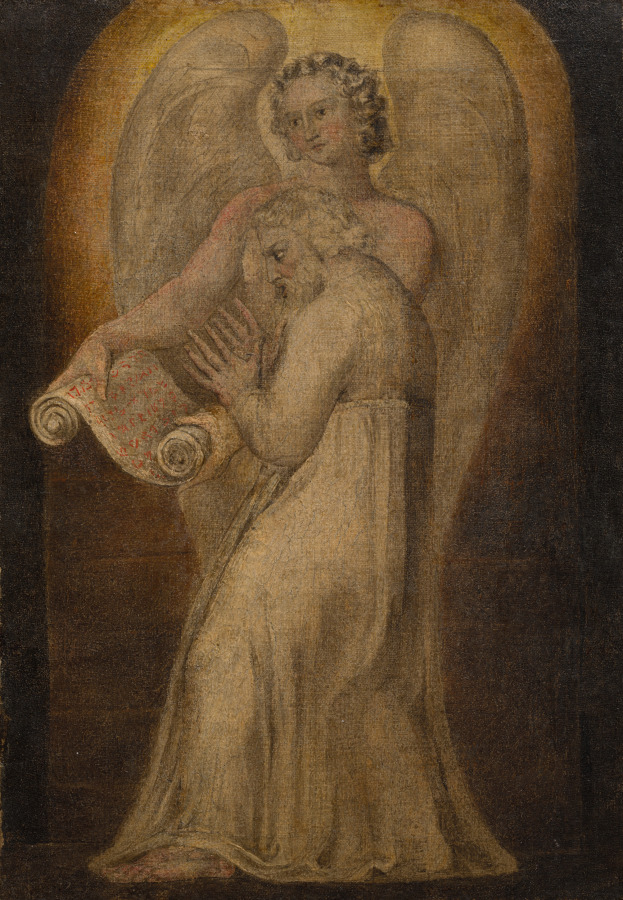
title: St. Matthew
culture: England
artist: William Blake (British, 1757–1827)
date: 1799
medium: tempera on canvas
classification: Painting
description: The energy and awe with which the evangelist Saint Matthew responds to the angel presenting the divinely inspired text echoes William Blake’s attitude toward artistic inspiration. From childhood Blake experienced visions that are reflected in the otherworldliness of his work. While Blake was not embraced by the fine art establishment, a small group of patrons believed in his genius and commissioned works in which his unusual visions had free rein.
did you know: Like St. Matthew, William Blake reported having visions of angels throughout his life.